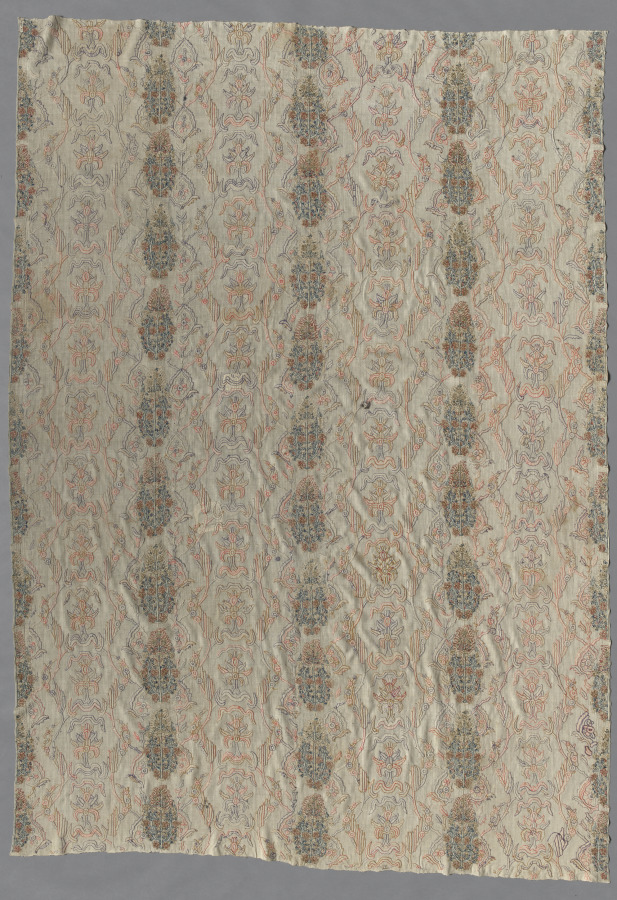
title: Bedspread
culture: Greece, Epirus, Yaninna, 19th century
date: 1800s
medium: embroidery: silk on linen tabby ground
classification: Embroidery